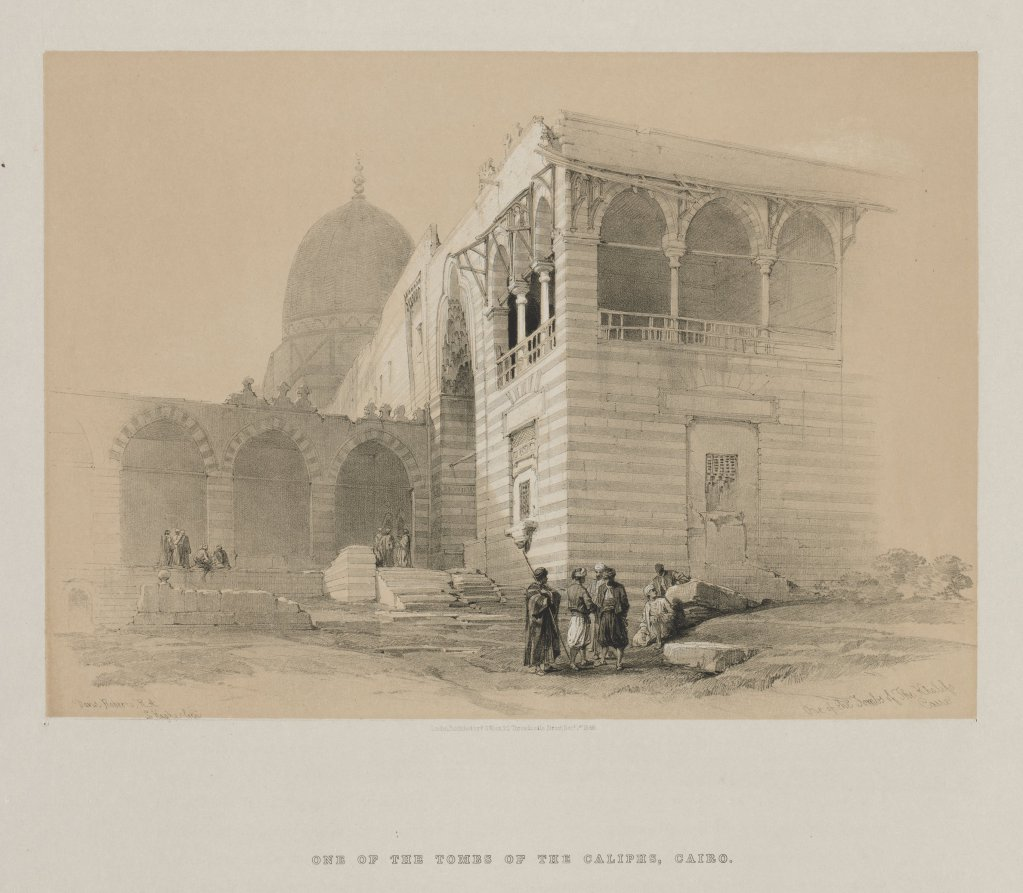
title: Egypt and Nubia, Volume III: One of the Tombs of the Khalifs, Cairo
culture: England, 19th century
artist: Louis Haghe (British, 1806–1885)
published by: F. G. Moon, 20 Threadneedle Street, London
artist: after David Roberts (Scottish, 1796–1864)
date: 1848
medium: color lithograph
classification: Print